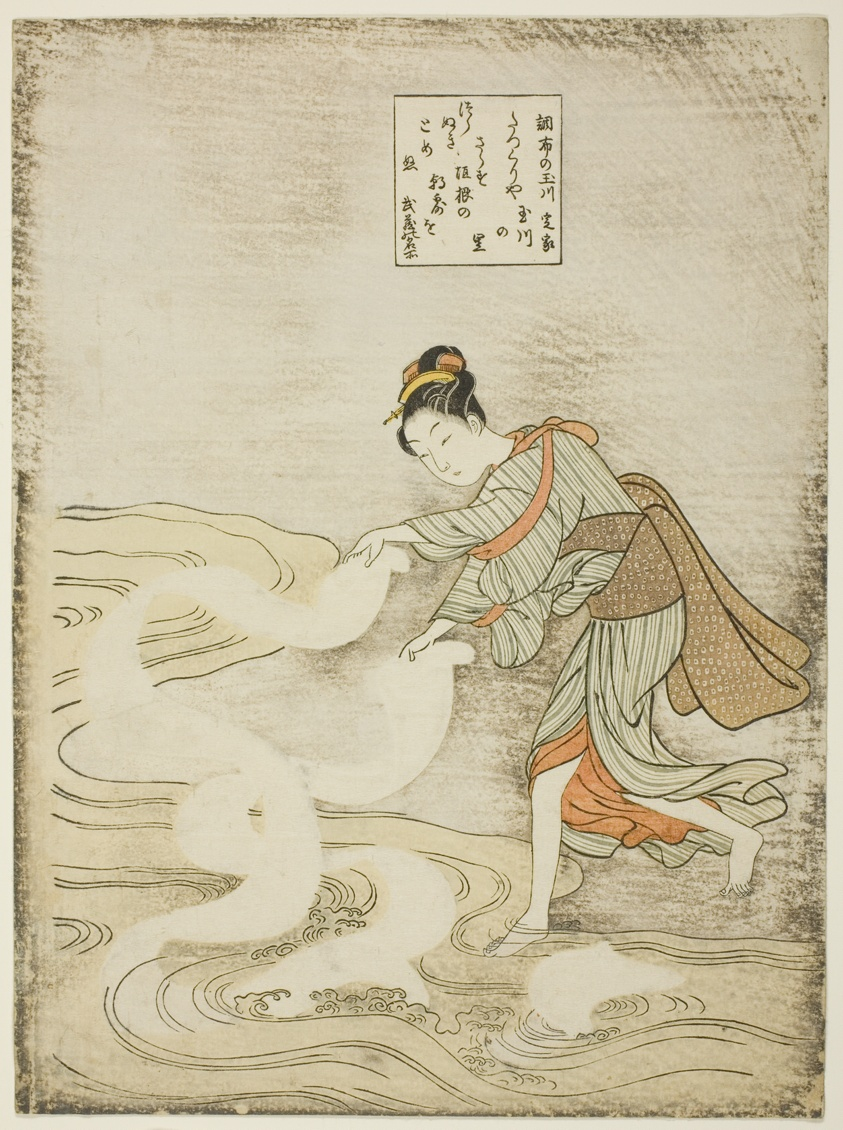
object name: Print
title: The Jewel River at Chofu (Chofu no Tamagawa), from an untitled series of Six Jewel Rivers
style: Japanese (culture or style)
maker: Suzuki Harunobu 鈴木 春信; Japanese, 1725 (?)-1770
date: c. 1767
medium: Color woodblock print; chuban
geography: Japan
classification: woodblock print; print; asian art